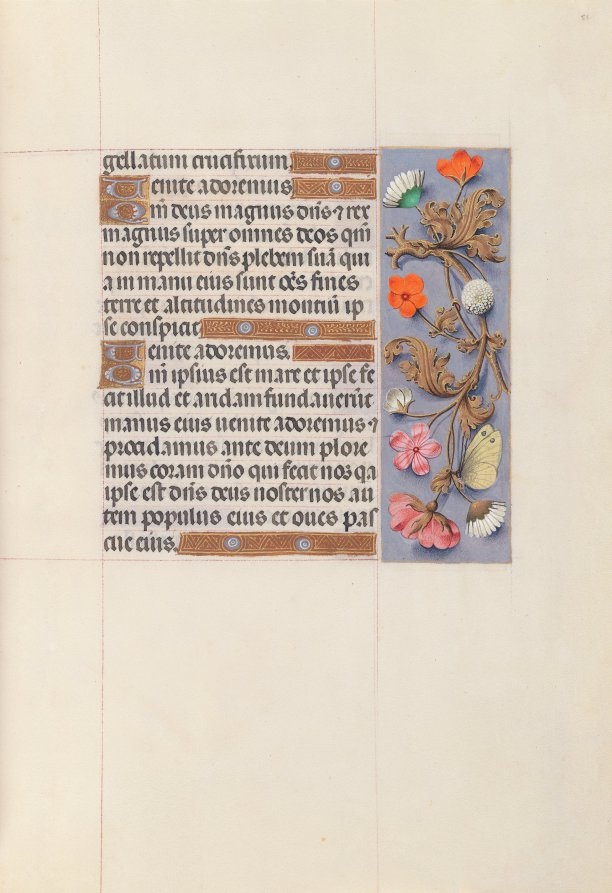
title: Hours of Queen Isabella the Catholic, Queen of Spain: Fol. 51r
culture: Flanders, Ghent and Bruges, late 15th century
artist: Master of the First Prayerbook of Maximillian (Flemish, c. 1444–1519)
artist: and Associates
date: c. 1500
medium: ink, tempera, and gold on vellum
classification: Bound Volume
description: This manuscript was illuminated by a circle of at least five highly organized manuscript painters active in the Flemish cities of Ghent and Bruges. The principal illuminator was Alexander Bening, who painted the majority of the book's miniatures. Manuscripts produced by this circle of artists are renowned for the decoration of their borders, which typically feature a rich variety of realistically-painted flowers, birds, and butterflies. This prayer book, called a book of hours, was intended not for a cleric, but for the private devotions of a lay person-in this case, Isabella the Catholic, Queen of Spain (1451-1504). Isabella's coat of arms embellishes the book's frontispiece. It is unlikely that the book was commissioned by the Queen herself; rather, she probably received it as a diplomatic gift from someone courting her patronage, perhaps Cardinal Francisco Jimenez de Cisneros. A Franciscan friar, Jimenez was dependent upon Isabella for his advancement, first to the post of Queen's confessor in 1492, and then to Archbishop of Toledo in 1495.